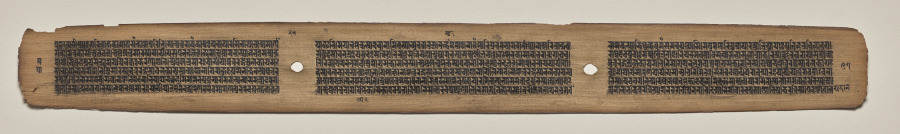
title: Text, Folio 27 (verso), from a Manuscript of the Perfection of Wisdom in Eight Thousand Lines (Ashtasahasrika Prajnaparamita-sutra)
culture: Eastern India, Bihar, Vikramashila Monastery. Painting: Nepal, Kathmandu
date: Sunday, September 14, 1119 (year 239 of the Newar Samvat in the month of Ashvina)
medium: gum tempera and ink on palm leaves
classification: Painting